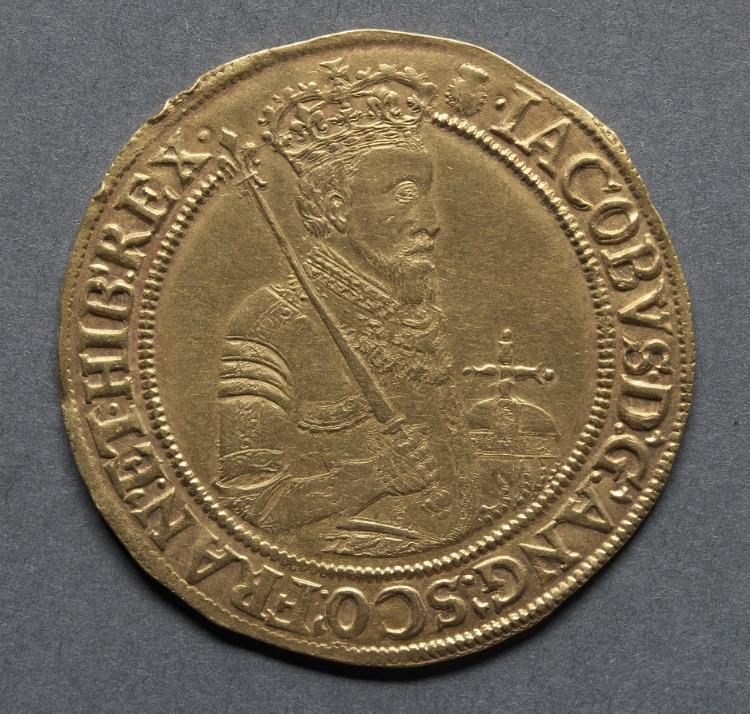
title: Sovereign: James I (obverse)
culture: England, James I, 1603-1625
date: 1603–1604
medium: gold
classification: Coins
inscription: IACOBVS. D; G; ANG; SCO; FRAN; ET. HIB; REX.